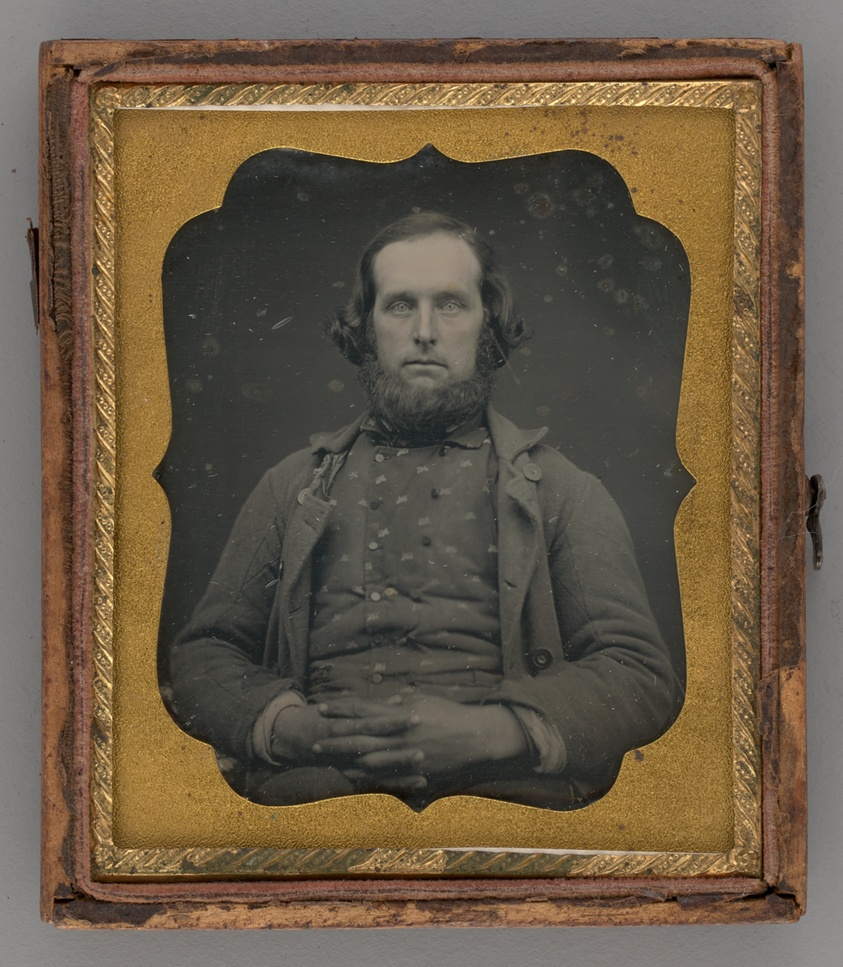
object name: Photograph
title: Untitled (Portrait of Seated Man)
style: 19th century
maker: Unknown maker; American, 19th century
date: 1852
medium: Daguerreotype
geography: United States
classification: portrait; daguerreotype; photograph; photographic process; photography; portrait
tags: lundberg collection, mines, portraits, portraits: male subject